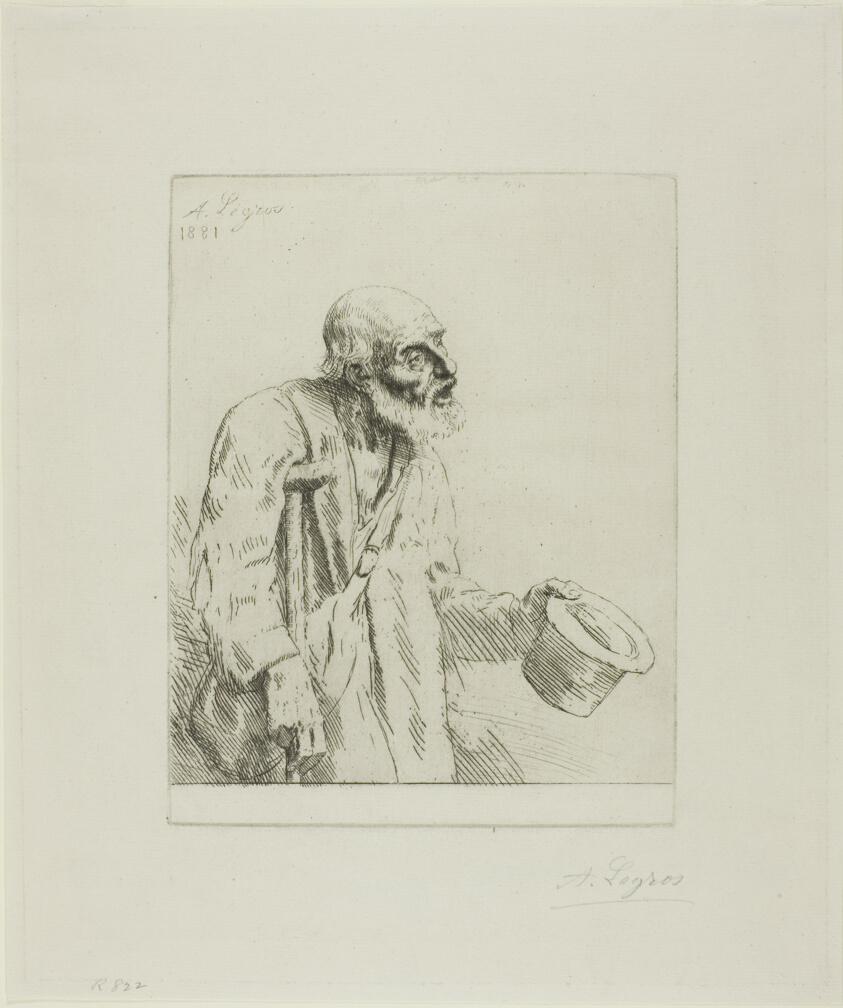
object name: Print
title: Beggar with Crutches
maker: Alphonse Legros (French, 1837-1911)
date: 1881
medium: Etching on ivory laid paper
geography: France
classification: etching; print; prints and drawing